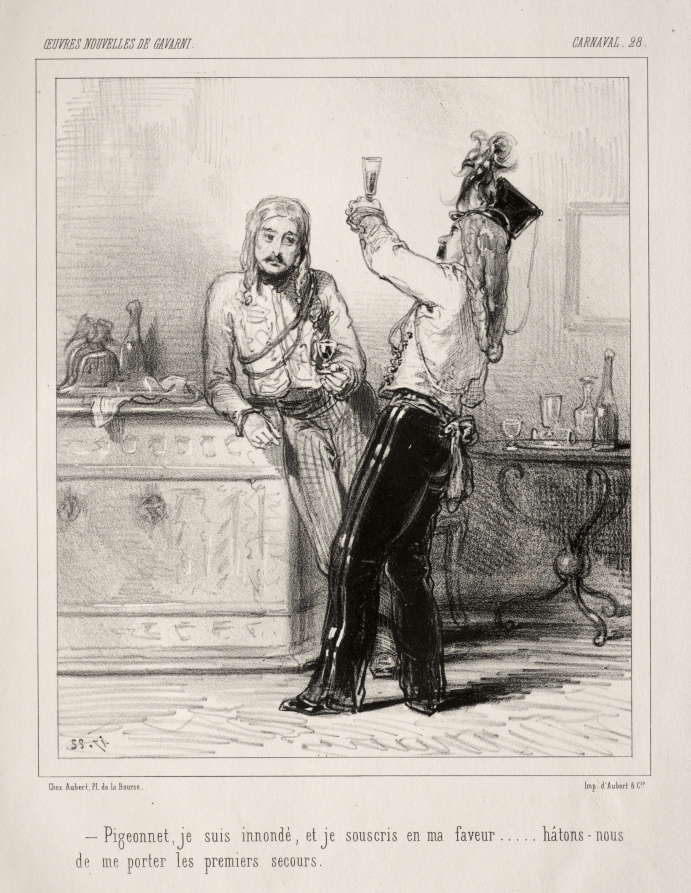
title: Carnaval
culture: France, 19th century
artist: Paul Gavarni (French, 1804–1866)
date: c. 1841–47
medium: lithograph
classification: Print